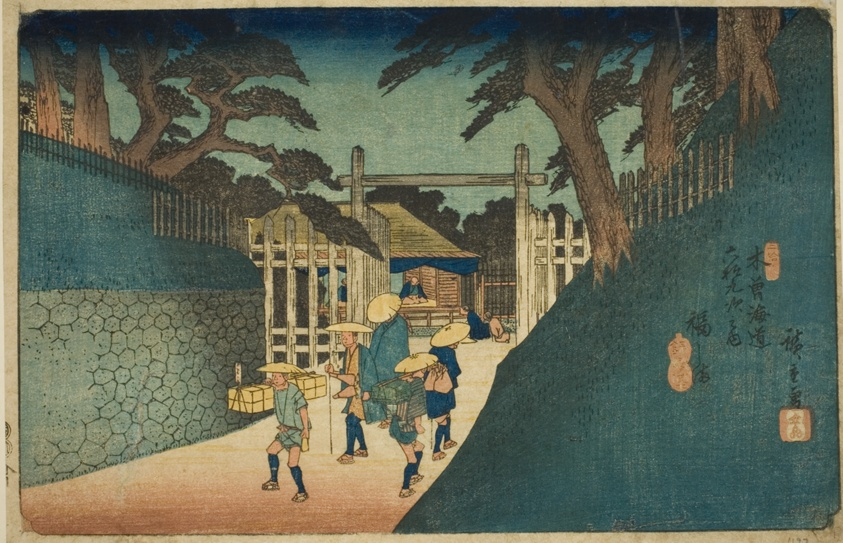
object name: Print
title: No. 38: Fukushima, from the series "Sixty-nine Stations of the Kisokaido (Kisokaido rokujukyu tsugi no uchi)"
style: Japanese (culture or style)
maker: Utagawa Hiroshige 歌川 広重; Japanese, 1797-1858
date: c. 1835/38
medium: Color woodblock print; oban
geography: Japan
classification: woodblock print; print; asian art